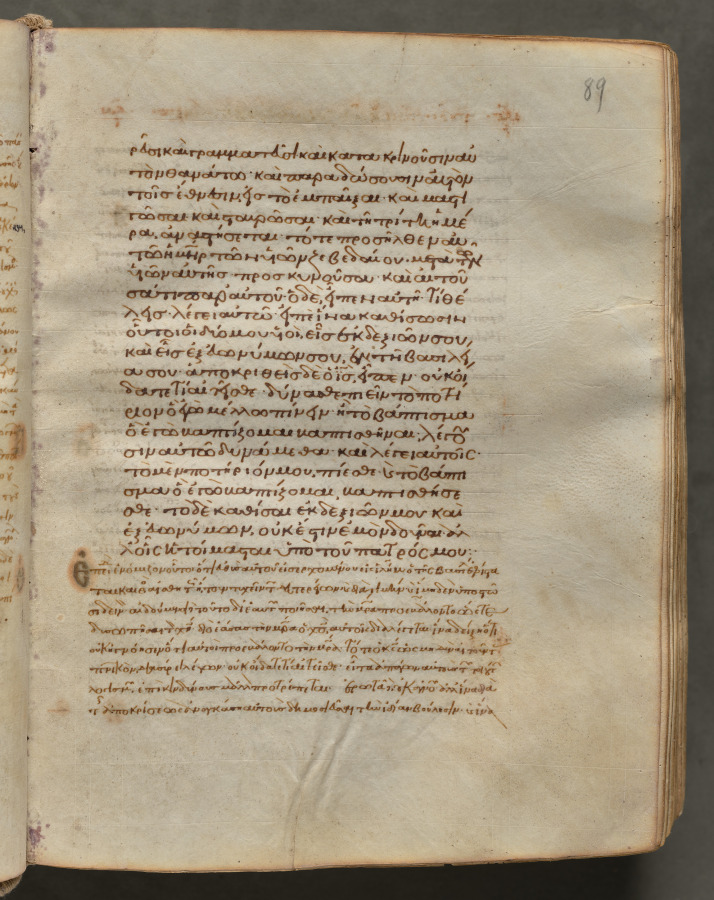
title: Text, folio 89 (recto), from a Gospel Book with Commentaries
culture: Byzantium, Constantinople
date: c. 1000–1100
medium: ink, tempera, and gold on vellum; leather binding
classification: Bound Volume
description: Each of the four gospels in this book opens on a page with brilliantly illuminated borders depicting the author of the text as well as birds-principally peacocks, symbols of the immortality of the soul-and fountains, representing the fountain of life and the salvation of the soul. This volume consists of 428 leaves with texts in Greek. Its level of sophistication suggests that it was probably written and decorated in a monastery in Constantinople.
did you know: Gospel Books were carried in procession through Byzantine churches.